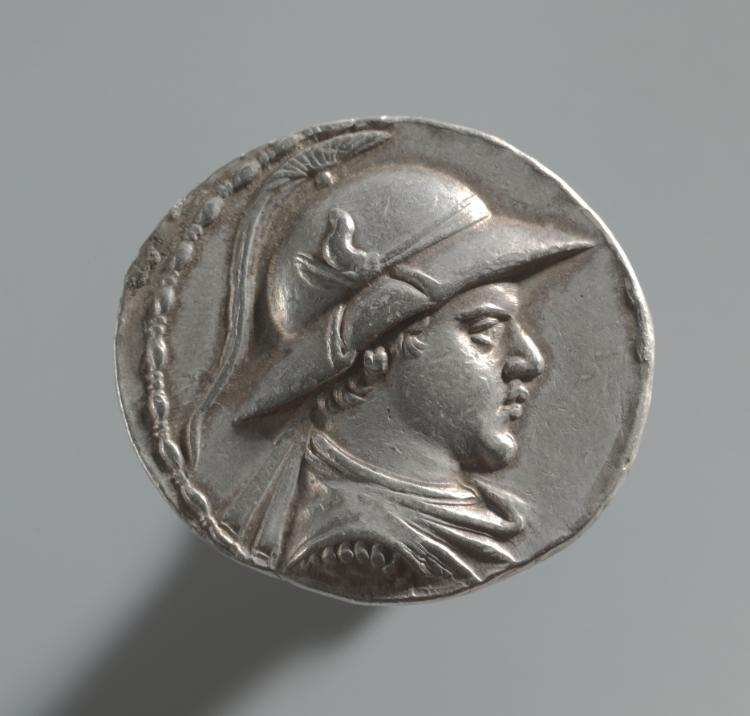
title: Coin of Eukratides I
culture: Afghanistan, Bactria, Eucratides I (171–145 BCE)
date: 170–145 BCE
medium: silver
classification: Coins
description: After Alexander of Macedon succeeded in conquering Egypt and Persia in 331 BC, his ambition to rule the known world led him further east across Bactria in Afghanistan, through the Hindu Kush mountain pass, and into India. There he succeeded in defeating all the local kings of the region until his men, on the brink of mutiny, insisted that they return to Greece. Alexander left governors in charge of his territories, and after his death in 323 BC, his governors became independent kings, establishing Hellenistic cities and a Greek cultural base in the region, which lasted for almost 200 years. The king of Greek descent who ruled over territories in Afghanistan and Pakistan depicted himself with the brimmed military helmet with the bull's ear and horn of Poseidon, worn by generals from Macedon, the northern Greek country from which Alexander came. After his death, Alexander's vast empire that stretched from Macedon across Egypt and Persia all the way to the Indus River was divided among military leaders in his army. On the reverse side of this coin are the twins Castor and Pollux riding horseback with long spears. These twins were sons of Zeus. Since Alexander considered himself to be an offspring of Zeus, Eukratides referenced his link to Alexander by including them on his coin.